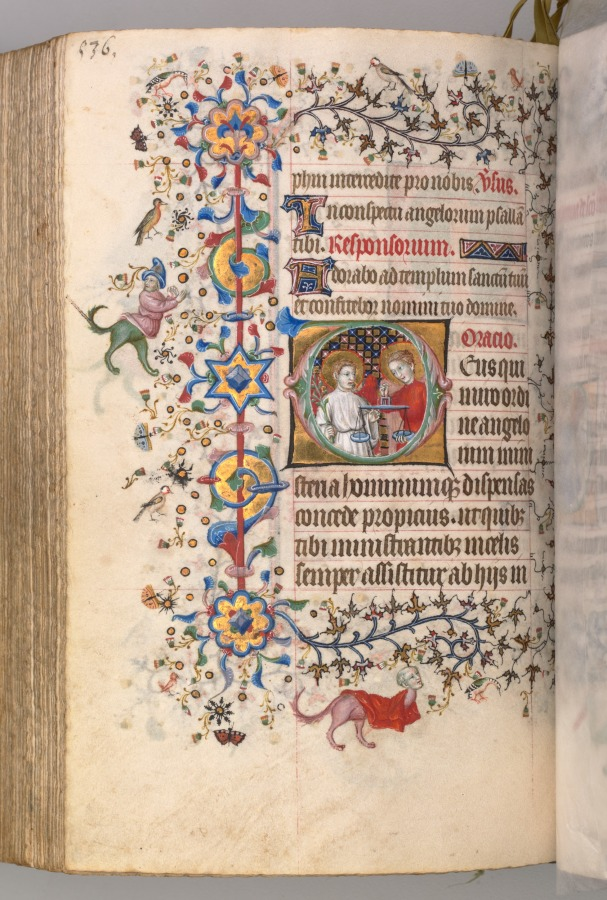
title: Hours of Charles the Noble, King of Navarre (1361-1425): fol. 262v, Text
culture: France, Paris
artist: Master of the Brussels Initials and Associates (French)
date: c. 1405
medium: ink, tempera, and gold on vellum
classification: Bound Volume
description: This precious volume was obviously highly prized by its owner, the French-born King of Navarre, who had his coat of arms painted on no less than twenty folios. Rather than directly commissioning this manuscript from a specific workshop, it seems that Charles the Noble acquired his book of hours -- perhaps ready-made for the luxury market -- while on a trip to Paris in 1404-05. A collaborative effort, six painting styles are evidenced within the pages of this codex, those of two Italians, two Frenchmen, and two Netherlanders. The painter who was responsible for the planning and decoration of the book, and who produced seventeen of the large miniatures, was a Bolognese artist known as the Master of the Brussels Initials. His principal assistant, responsible for most of the borders, was a Florentine who signed his name "Zecho" da Firenze on folio 208 verso.